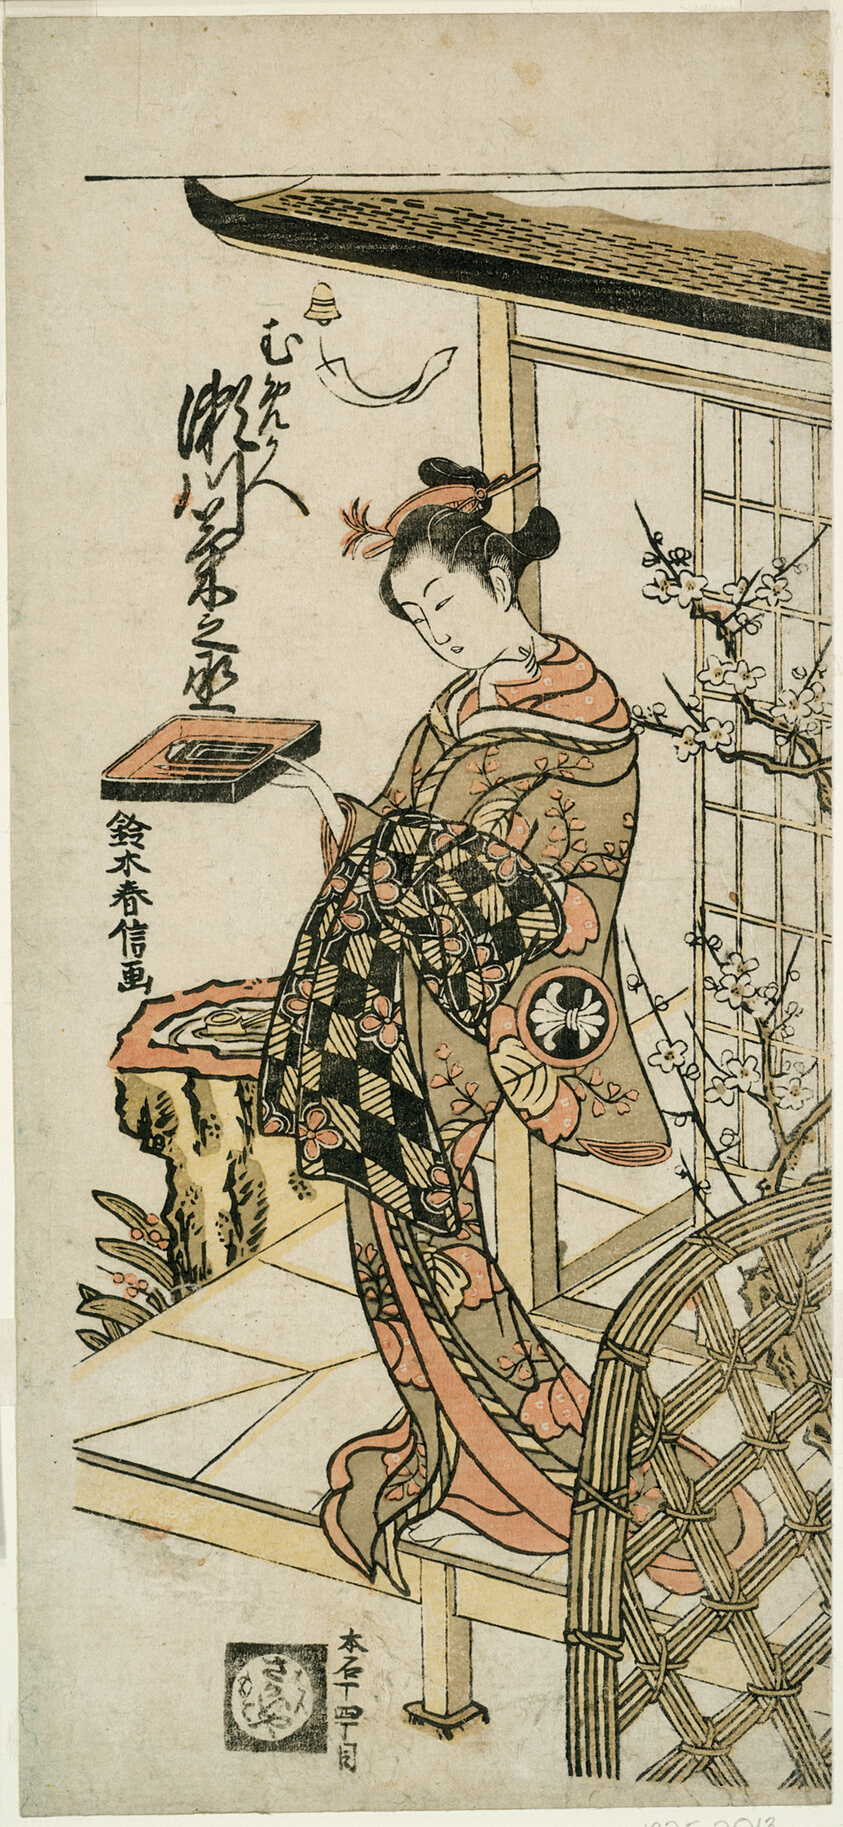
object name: Print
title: The Actor Segawa Kikunojo II as the courtesan Umegae in the play "Hiragana Seisuiki," performed at the Ichimura Theater in the first month, 1764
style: Japanese (culture or style)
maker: Suzuki Harunobu 鈴木 春信; Japanese, 1725 (?)-1770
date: 1764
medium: Color woodblock print; hosoban, benizuri-e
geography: Japan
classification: woodblock print; print; asian art